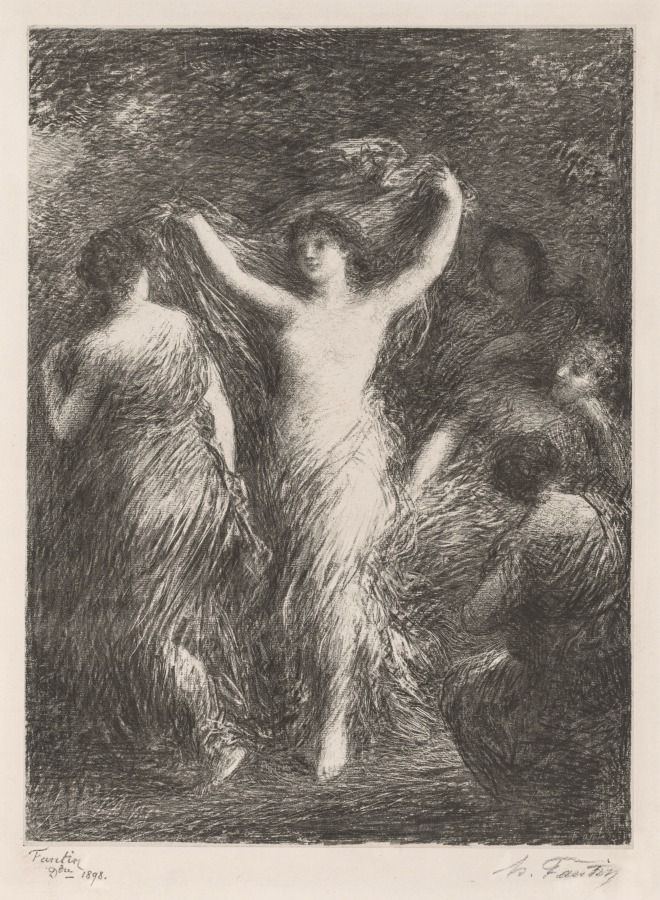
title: Danses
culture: France, 19th century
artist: Henri Fantin-Latour (French, 1836–1904)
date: 1898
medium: lithograph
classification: Print